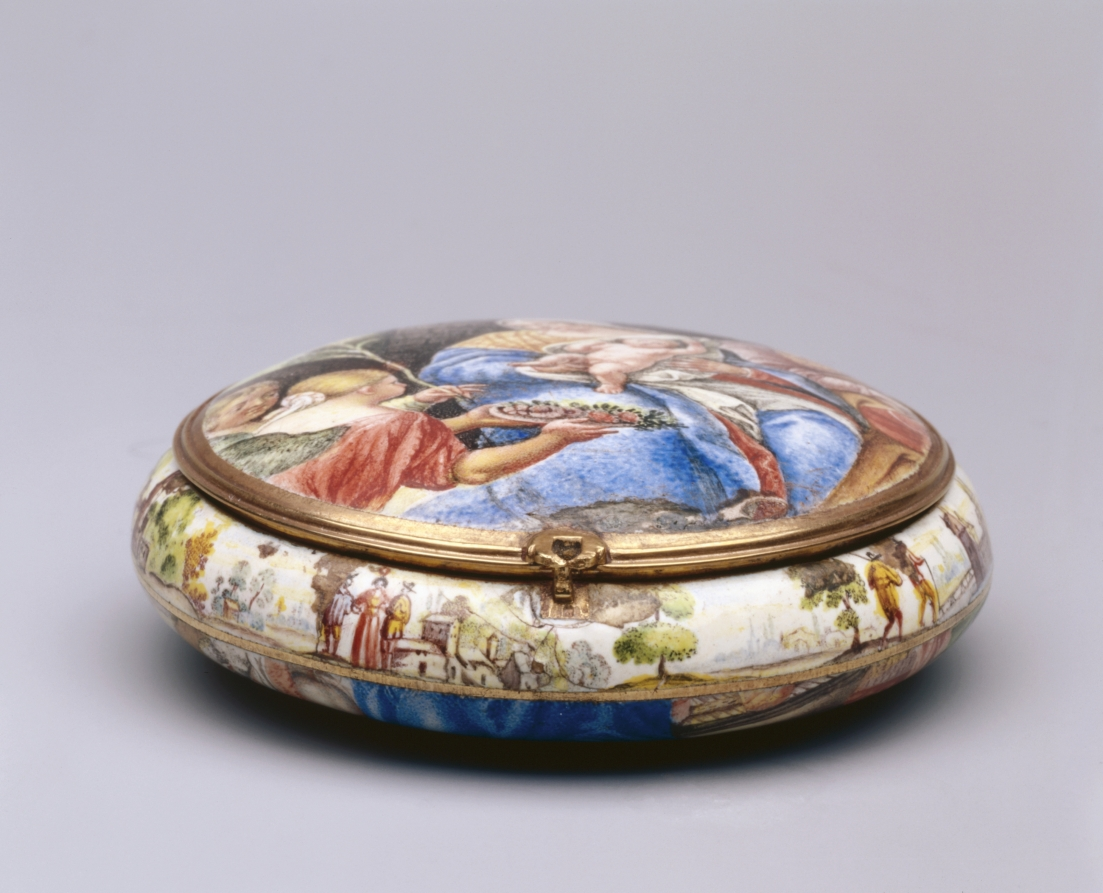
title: Watchcase (Boîtier de montre)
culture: France, 17th century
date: c. 1640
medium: gold and enamel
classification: Jewelry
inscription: [engraved on the rim]: "B8"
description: In the 1630s, the practice of painting with enamel on metal became a means for French miniature painters to achieve a more richly colored, durable product. Previously miniatures were painted with watercolor on vellum, a material made from animal skin. This case would have originally held a watch, but was later transformed into a simple box through the removal of the watch mechanism and ring. This watch case is richly painted inside and out with miniatures modeled after well-known religiously allegorical works.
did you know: Inspiration for the box’s miniatures was drawn from works by Peter Paul Rubens’ The Holy Family with Saints John the Baptist and Elizabeth (1615) (back panel) and Nicolas Cochin (interior base).